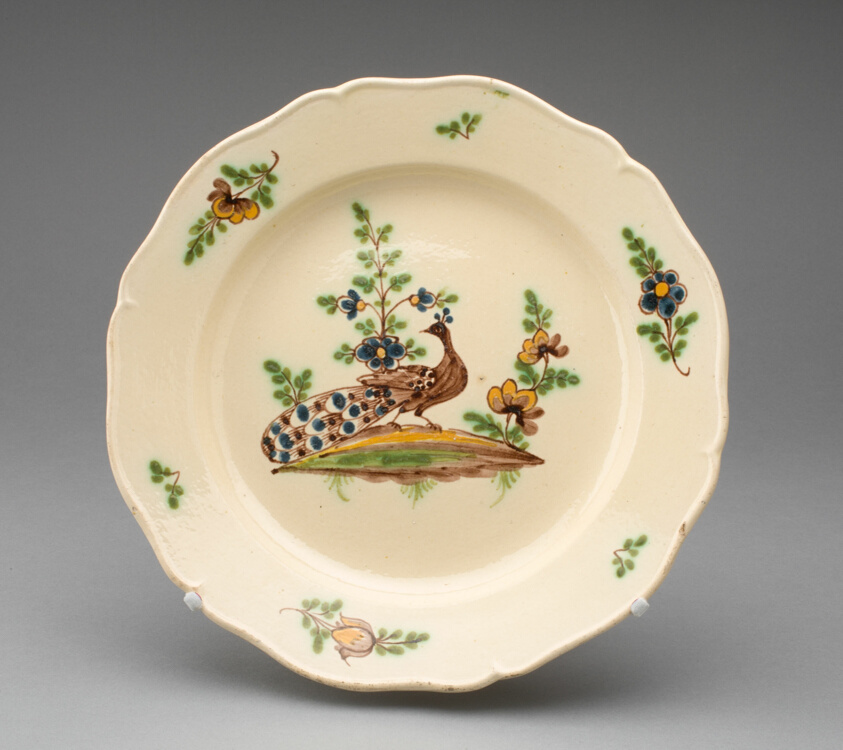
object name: Ceramics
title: Plate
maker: Polish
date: First half of 19th century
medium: Lead-glazed earthenware (creamware) with polychrome decoration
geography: Poland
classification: plate (general, dish); dish (vessel); creamware (queensware); earthenware; european decorative arts; ceramics